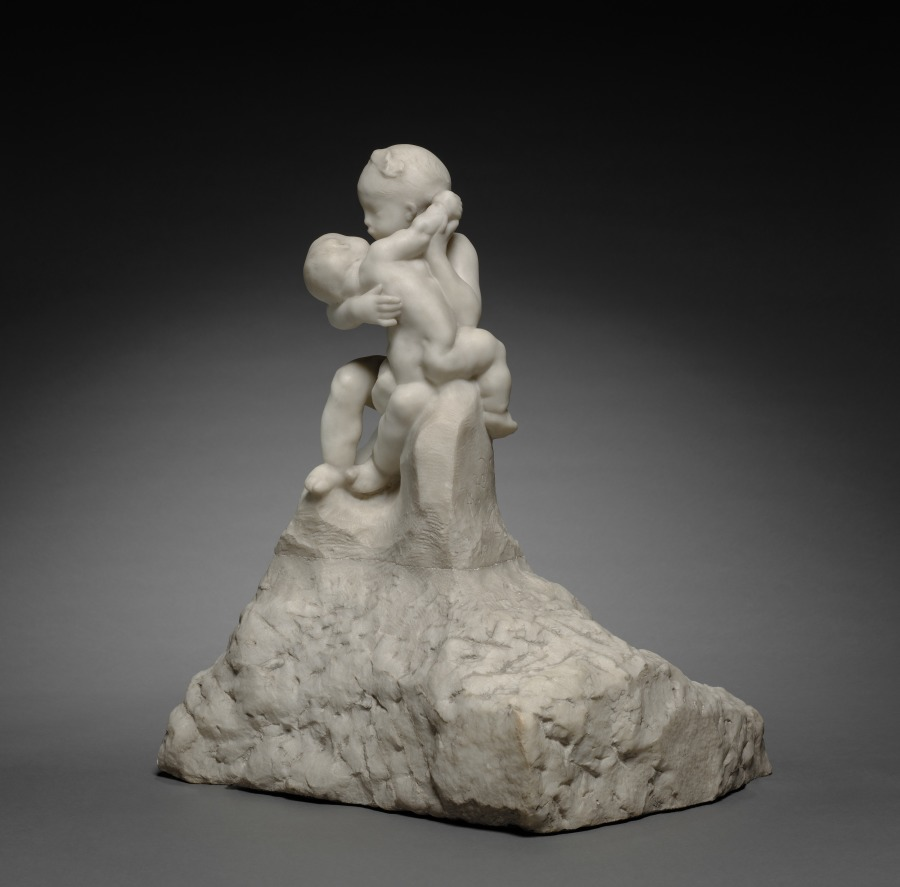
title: Little Brother and Sister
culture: France, early 20th Century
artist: Auguste Rodin (French, 1840–1917)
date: 1916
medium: marble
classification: Sculpture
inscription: Signed on base beneath figures: "A. Rodin"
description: Rodin spent years exploring new ways of representing the human emotions of love and affection experienced at different stages of life. The bodies and gestures of the children here suggest an innocent foreshadowing of the mature couple in the artist’s celebrated sculpture The Kiss of 1882. Both works feature a strong tactile contrast between the rough-hewn lower area and the smooth surfaces of the nude body above. Upwardly spiraling forms, combined with shifting areas of light and shadow, infuse the sculpture with dynamic energy.